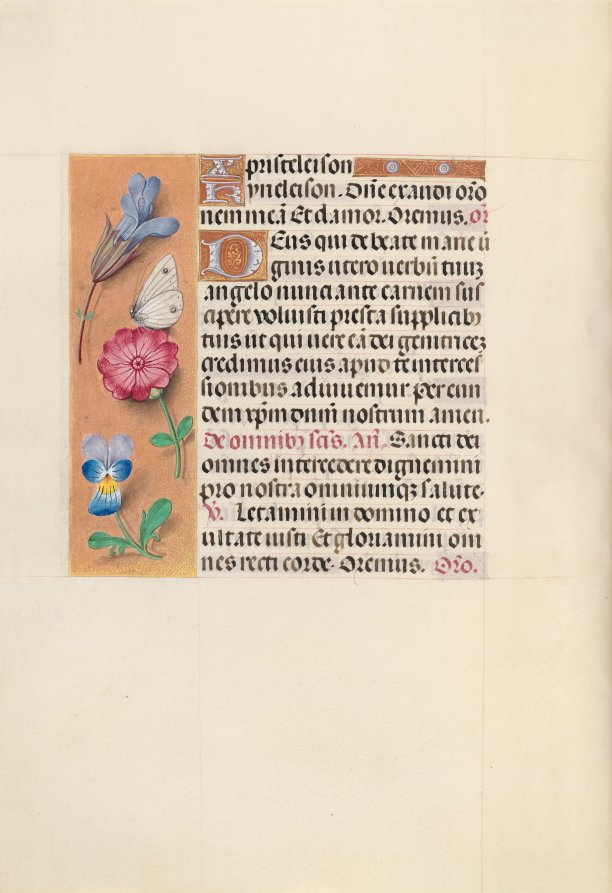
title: Hours of Queen Isabella the Catholic, Queen of Spain: Fol. 124v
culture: Flanders, Ghent and Bruges, late 15th century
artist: Master of the First Prayerbook of Maximillian (Flemish, c. 1444–1519)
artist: and Associates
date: c. 1500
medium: ink, tempera, and gold on vellum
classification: Bound Volume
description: This manuscript was illuminated by a circle of at least five highly organized manuscript painters active in the Flemish cities of Ghent and Bruges. The principal illuminator was Alexander Bening, who painted the majority of the book's miniatures. Manuscripts produced by this circle of artists are renowned for the decoration of their borders, which typically feature a rich variety of realistically-painted flowers, birds, and butterflies. This prayer book, called a book of hours, was intended not for a cleric, but for the private devotions of a lay person-in this case, Isabella the Catholic, Queen of Spain (1451-1504). Isabella's coat of arms embellishes the book's frontispiece. It is unlikely that the book was commissioned by the Queen herself; rather, she probably received it as a diplomatic gift from someone courting her patronage, perhaps Cardinal Francisco Jimenez de Cisneros. A Franciscan friar, Jimenez was dependent upon Isabella for his advancement, first to the post of Queen's confessor in 1492, and then to Archbishop of Toledo in 1495.